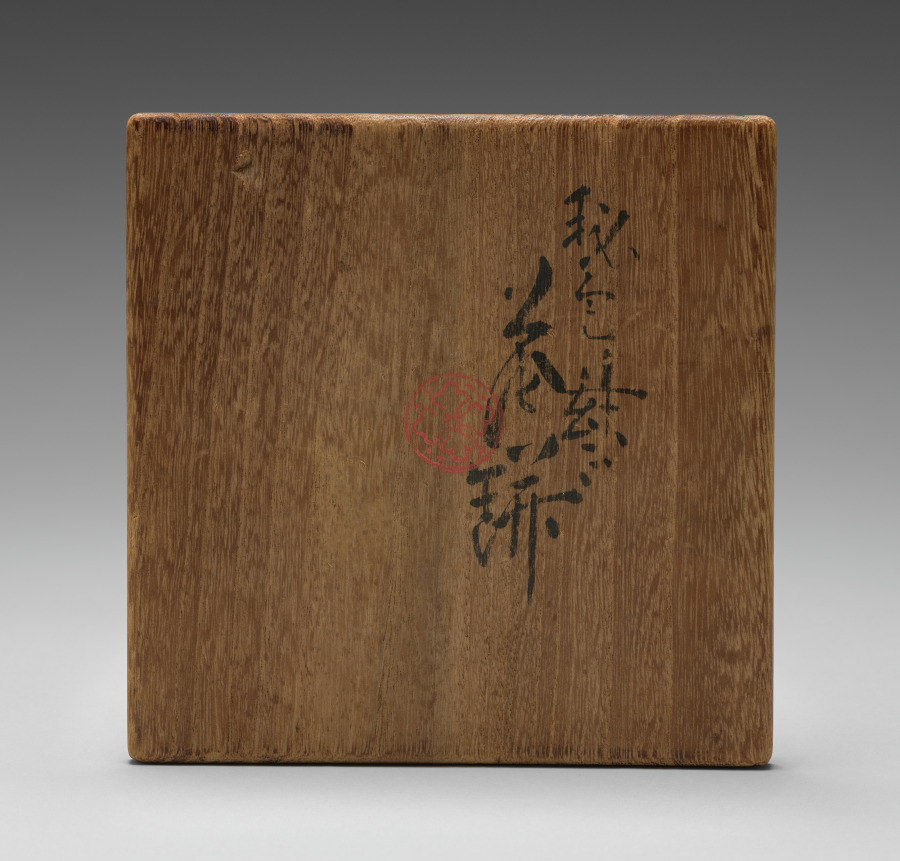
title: Flower Vase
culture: Japan, Meiji period (1868–1912)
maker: Seifū Yohei III (Japanese, 1851–1914)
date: 1912–14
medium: Porecelain with green glaze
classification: Ceramic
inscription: The vase's box lid identifies the vase as hisokuyō (C. mise yao 秘色窯), or “mysterious color ware,” style.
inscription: 清風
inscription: 清風制之 【印】帝室技芸員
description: This flower vase has a tall, slightly flared foot and bulbous body with a slimmer neck. It is completely undecorated but for the hisoku, or “mysterious color,” glaze. Its box lid has a red seal with a flower on it, a rather unusual feature also seen on the box for the green-glazed water container that belonged to the Hosokawa family (see CMA 2022.197).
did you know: The vase's box lid identifies the glaze as hisoku 秘色 or “mysterious color.”